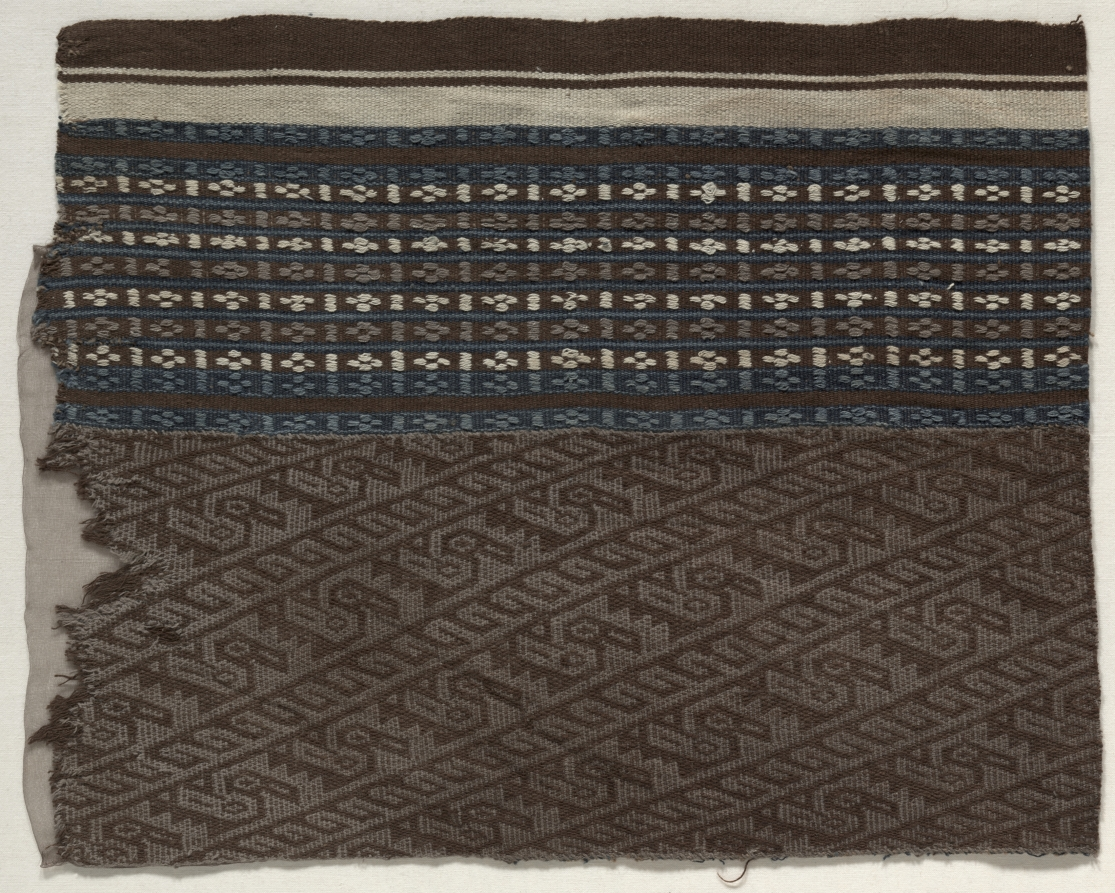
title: Fragment Composed of Two Fabrics Joined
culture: Peru, Central Coast, Chancay, 12th-15th century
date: c. 1100–1400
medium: plain compound twill and plain compound tabby; cotton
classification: Textile